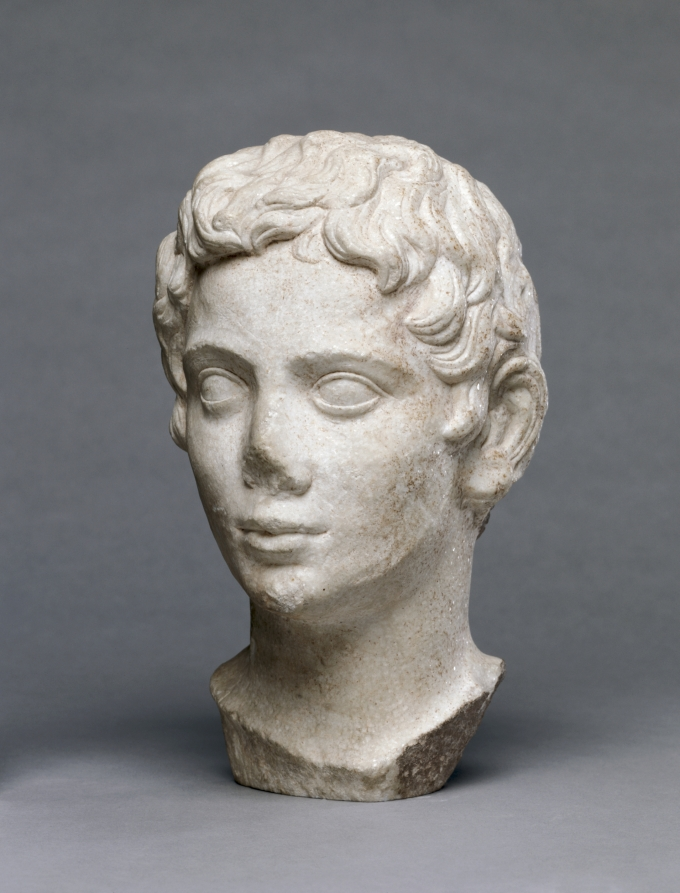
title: Portrait Head of a Youth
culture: Egypt, Alexandria, Roman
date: 1–100 CE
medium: marble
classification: Sculpture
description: Several unusual features of this head suggest that its carving was never finished in antiquity. These include unfinished hair around the ears, small bumps remaining in the hair near the front and top of the head, and the lack of a finely polished surface. Although said to have been found in Egypt, the head is carved of dolomitic marble thought to come from the Saliari region of the northern Greek island of Thasos.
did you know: The carving of this head was never finished.